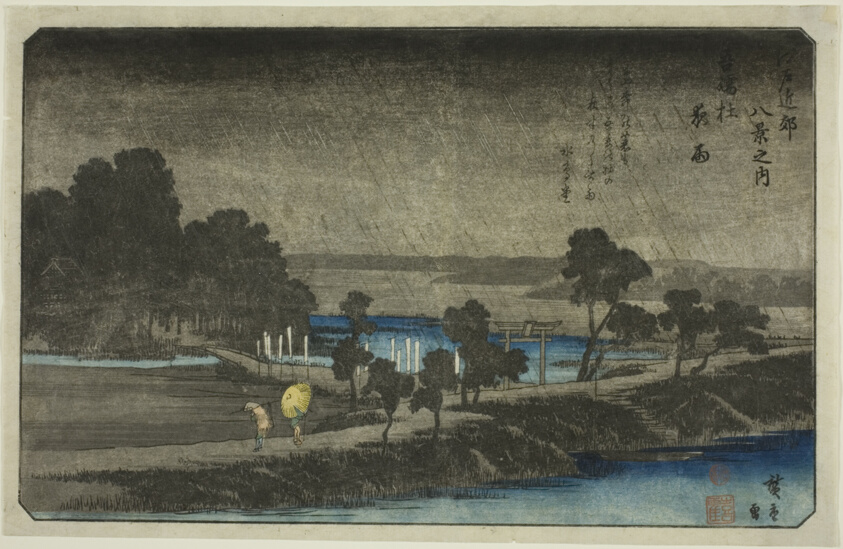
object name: Print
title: Evening Rain at Azuma Shrine (Azuma no mori yau), from the series "Eight Views in the Environs of Edo (Edo Kinko hakkei no uchi)"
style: Japanese (culture or style)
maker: Utagawa Hiroshige 歌川 広重; Japanese, 1797-1858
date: c. 1837/38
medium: Color woodblock print; oban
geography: Japan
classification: print; asian art